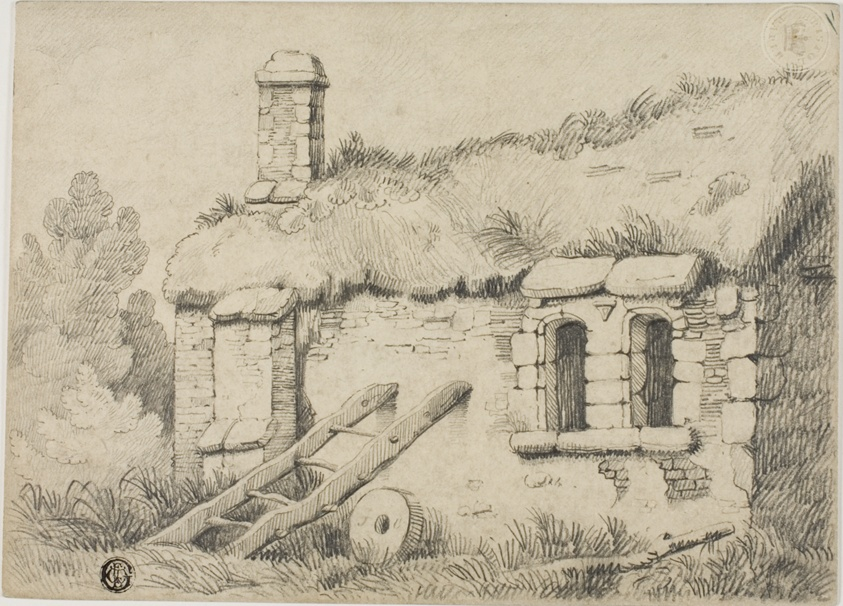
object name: Drawing and Watercolor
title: Thatched Cottage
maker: After Samuel Prout; English, 1783-1852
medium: Graphite on cream wove Bristol paper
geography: England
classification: graphite; drawings (visual works); prints and drawing